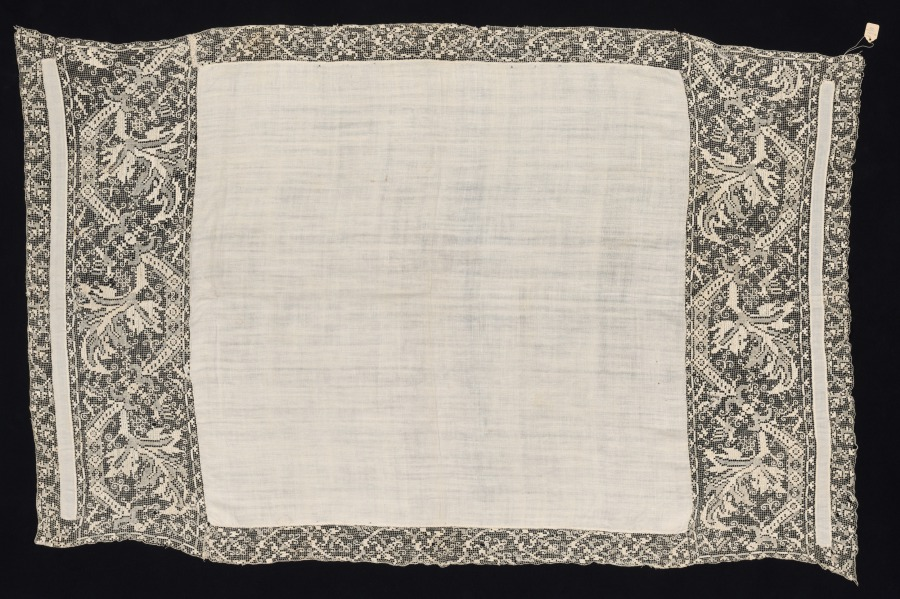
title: Cloth with Border of Vegetal Pattern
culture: Italy, 1800s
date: 1800s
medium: Bleached plain weave linen (est.): needle lace, filet/lacis (knotted ground and darned in two directions)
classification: Lace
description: A scrolling vine with budding vegetation or a tendril motif is a recurring pattern in needle lace. The frequent use of the motif, adapted in lace from different centuries and regions, suggests that it was found in a pattern book.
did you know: This cloth was given to the museum by Louise Tifft Brown, a native Clevelander who became an expert in lace while living in Venice for 35 years.